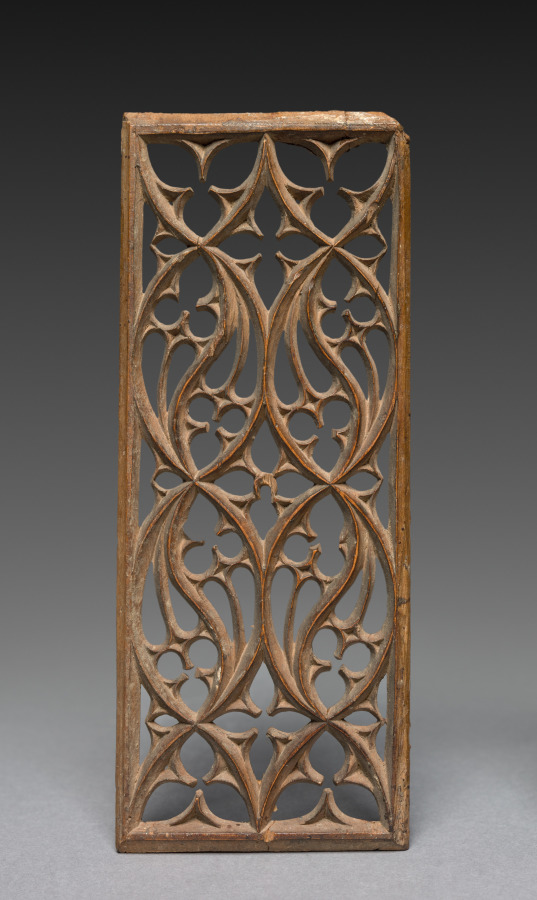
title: Panel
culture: France, 15th century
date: late 1400s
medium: walnut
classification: Furniture and woodwork